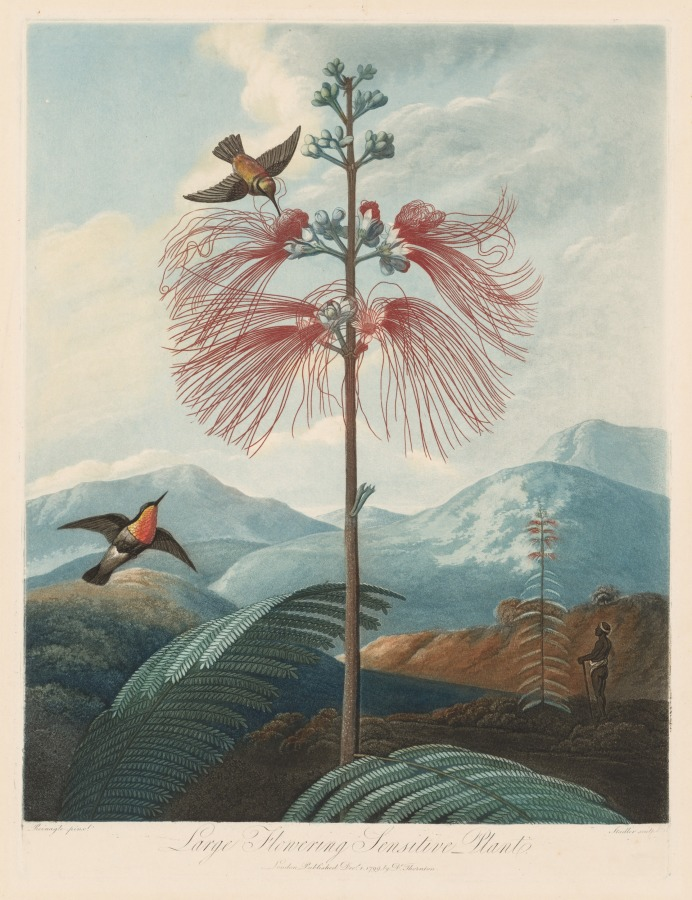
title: Large Flowering Sensitive Plant, Plate 16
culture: England, late 18th-early 19th Century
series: The Temple of Flora; or Garden of Nature. Picturesque Botanical Plates of the New Illustration of the Sexual System of Linnaeus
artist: Joseph Constantine Stadler (German, active 1780–1822)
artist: after Philip Reinagle (British, 1749–1833)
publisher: Robert John Thornton (British, 1768–1837)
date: 1799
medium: Etching with printed and hand-applied color, aquatint, stipple, and engraving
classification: Print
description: Fueled by scientific and colonial expeditions that brought back plant specimens from across the globe, the science of botany blossomed in Enlightenment Europe. This print is from a sumptuously illustrated treatise known as The Temple of Flora. Commissioned and published by Dr. Robert John Thornton, a British medical botanist, the work illustrates the new plant classification system of Swedish scientist Carl Linnaeus. Yet while these prints realistically depict buds, flowers, and leaves, they show them in environments where they did not actually grow. Instead, Thornton had the artists situate specimens in imagined landscapes, often reminiscent of British colonial holdings, which he felt better suited the plants.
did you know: In The Temple of Flora, this print was accompanied by a scientific description and a poem written by Erasmus Darwin (Charles Darwin’s grandfather).